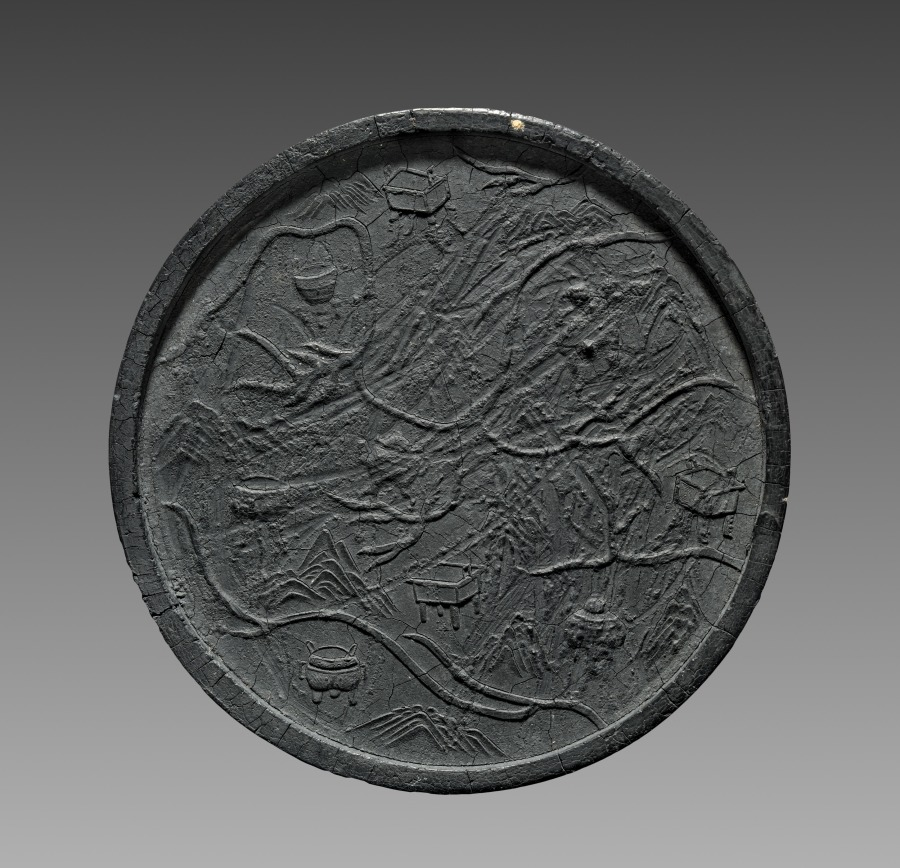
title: Ink Cake with Dragon in Relief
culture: China, Ming dynasty (1368–1644)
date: 1621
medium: ink cake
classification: Miscellaneous